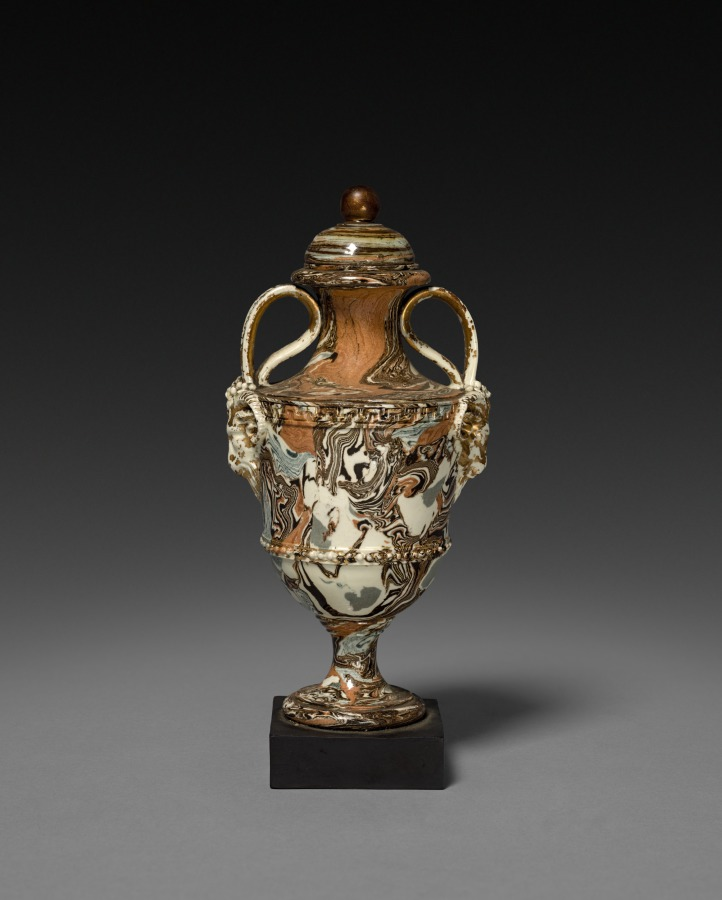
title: Urn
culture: England, late 18th or 19th century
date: late 1700s - 1800s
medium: earthenware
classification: Ceramic